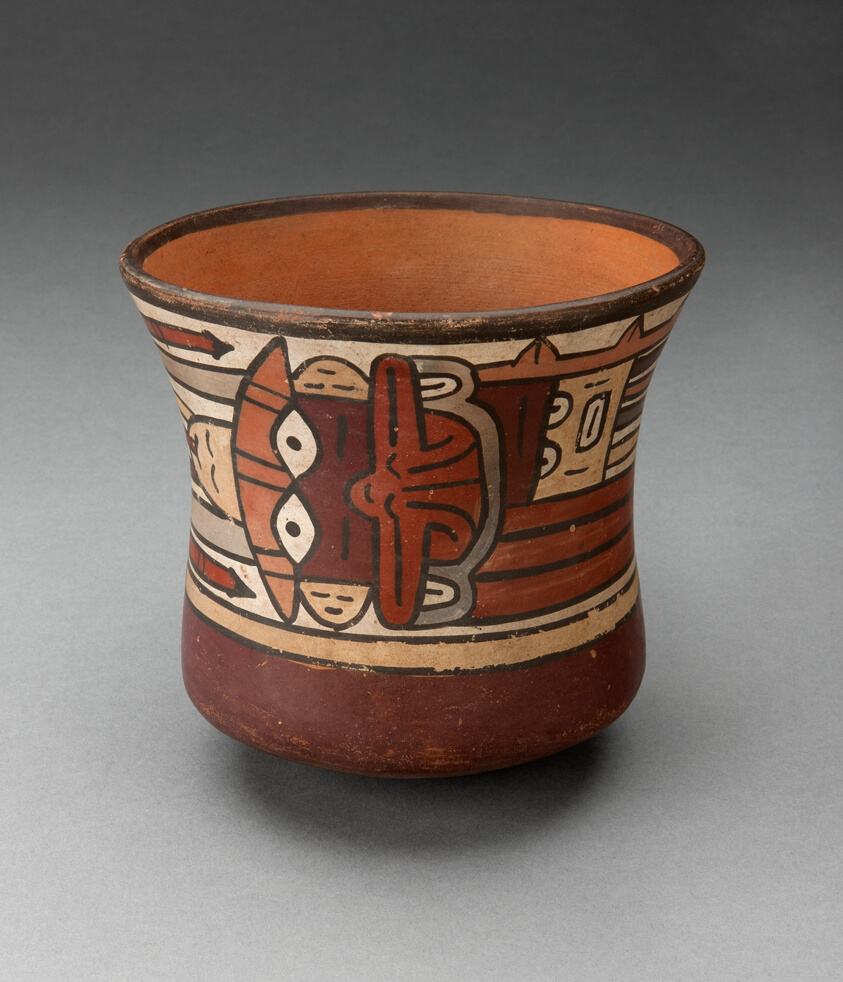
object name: Vessel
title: Short Beaker Depicting Ritual Figure wearing Costume with Bird Attributes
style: nazca, early intermediate period, Pre-Columbian, americas, Arts of the Americas, andean, andes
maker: Nazca; South coast, Peru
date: 180 BCE–500 CE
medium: Ceramic and pigment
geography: Nazca Valley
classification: earthenware; art of the americas; ceramics; vessel